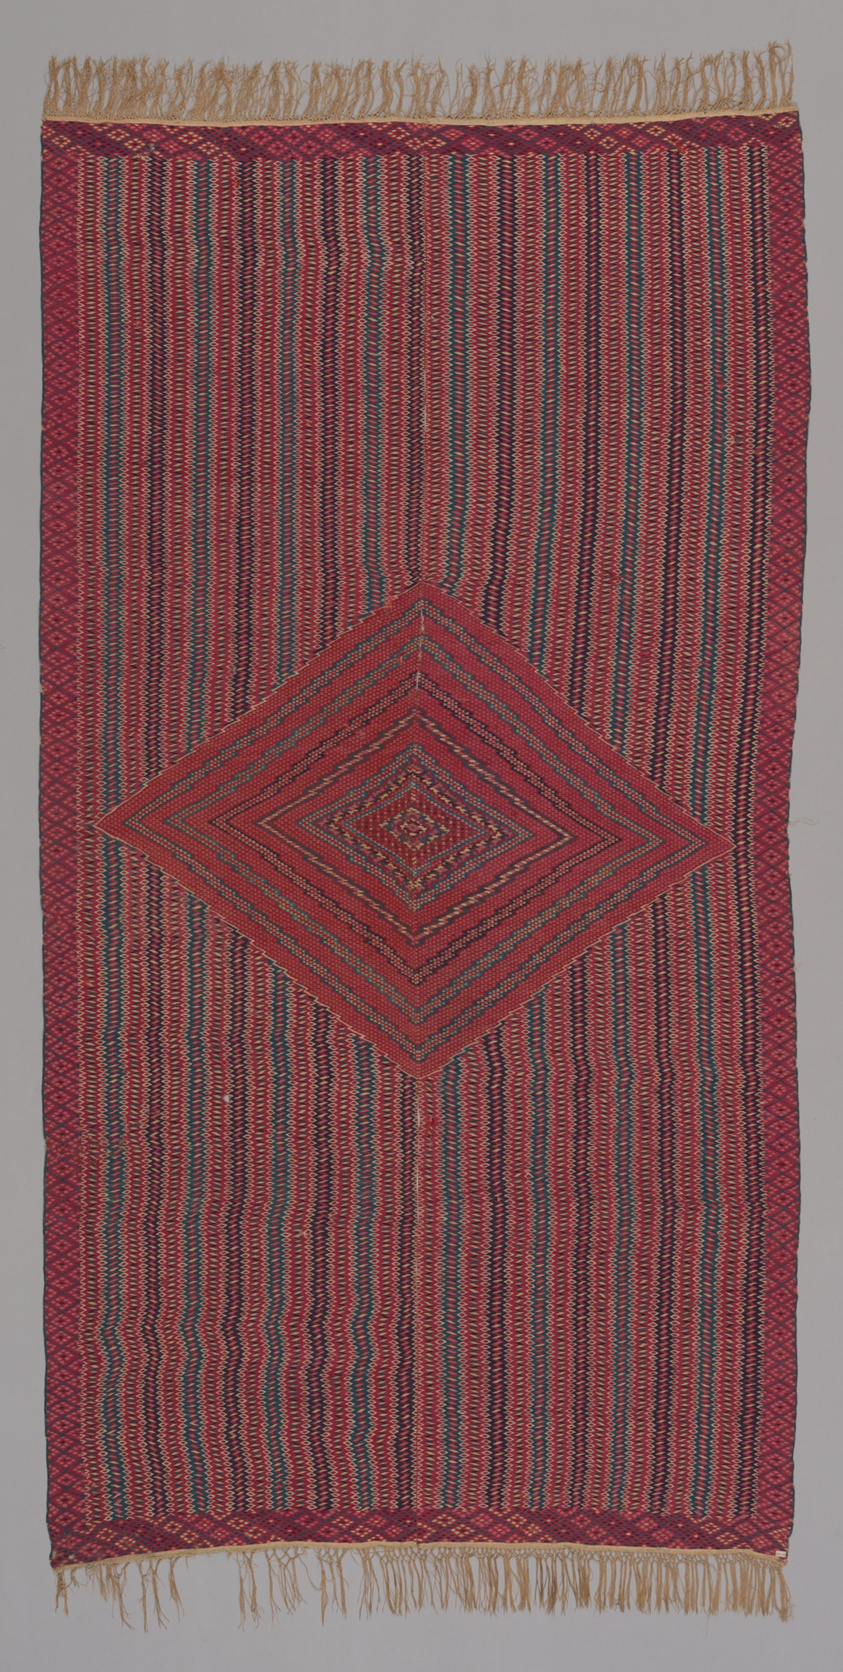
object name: Textile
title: Sarape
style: Folk Art, anasazi, Pre-Columbian, americas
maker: Mexico, possibly Saltillo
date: 1750/1800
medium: Cotton and wool, tapestry weave, slit; single dovetail; attached knotted fringe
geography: Mexico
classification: textile; weaving